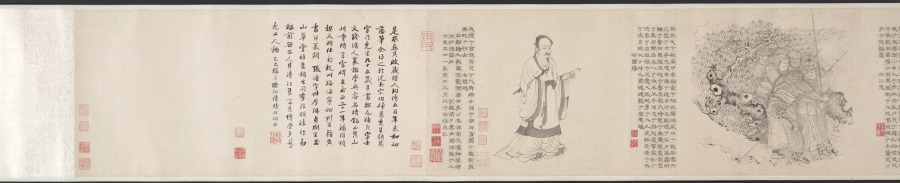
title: Nine Songs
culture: China, Yuan dynasty (1271-1368)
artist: Zhang Wo (Chinese, active c.1336–after 1364)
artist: Chu Huan (Chinese, active 1361)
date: 1361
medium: handscroll; ink on paper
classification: Painting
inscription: 7 colophons and 47 seals: 1 colophon, dated 1361, and 28 seals of Chu Huan 褚奐 (active c. 1361); 1 colophon, dated 1785, and 1 seal of Lu Shihua 陸時化 (1714-1779); 2 seals of Lu Yü-ch'ing (18th c.); 1 colophon, dated 1935, of Ye Gongchuo 葉恭綽 (1881-1968); 1 colophon, dated 1935, of Wu Hufan 吳湖帆(1894–1968); 1 colophon, dated 1938, and 1 seal of Wang Tongyu 王同愈 (1856-1941); 1 colophon, dated 1941, of Wu Huayuan 吳華源 (1893-1972); 1 colophon, dated 1942, and 9 seals of Xu Bangda 徐邦達 (1911–2012); 1 colophon, dated 1942, of Lang Jingshan 郎靜山 (1892-1995); 1 colophon, dated 1944, of Tang Yun 唐雲 (1910-1993); 6 seals of Wang Jiqian [C.C. Wang] 王季遷 (1907–2003).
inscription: Text of The Nine Songs written by Chu Huan at the end of each section.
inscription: 右離騷九歌圖，宋龍溟居士李公本，淮南張渥叔厚所畫妙絕當世。家藏請予書其辭目識于左。至正二十一年辛醜三月旦河南褚奐記。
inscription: Colophon by Lu Shihua 陸時化 (1714–1789): This scroll is fortunate to have been handed down from collections of the right people. Now, after 500 years, its condition is as good as when it was painted. I acquired this from Mr. Shen Guiyu [1673-1769], the President of the Board of Rites. The label is in his handwriting when he was 95 years old. I submit that Chu Huan (t. Shiwen) of the Yuan Dynasty was a native of Qiantang. His "seal" and li writings are in the style of Wu Rui. For example, in [Chu Kuei's] Ming ji lu [A list of masterpieces] is recorded the stele commemorating the restoration of the prefectural school of Kun-shan, the text of which was composed by Yang Weizhen in the twenty-first year of Zhizheng [1361]; and the calligraphy as well as the title in li style was by Chu Huan, who was at that time an assistant judge of the prefecture of Haining in the circuit of Hangzhou. Zhang Wo's zi is Shuhou (叔厚). His literary name is Zhen Qisheng (贞期生). According to [Gu Ying's] Yu shan cao tang ya jii, he liked to paint in the bai-miao or the "pure delineation" style after the method of Li Longmian [Li Gonglin 李公麟], which finds no peer among the ancient masters. This is agreed upon [by Pei Ch'iung] in his Qing jiang zhi who praised [Zhang Wo] as being quite learned and well-versed in many branches of the arts, especially figure painting. Recorded by Lu Shihua [The mountain dweller], listening to the pine, in the twelfth month of the yisi year [1785].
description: Painted in the baimiao, or fine-line drawing style, this ancient work demonstrates the literati’s use of abstract calligraphic brushwork for self-expression. The subject of the “Nine Songs”—songs associated with shamanistic rituals in the ancient Chu kingdom—had traditionally provided artists with myths and legends that they could explore and reinterpret in their own works.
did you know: Divided into eleven sections, the scroll contains illustrations by painter Zhang Wu followed by a transcription of the relevant verse by calligrapher Chu Huan.